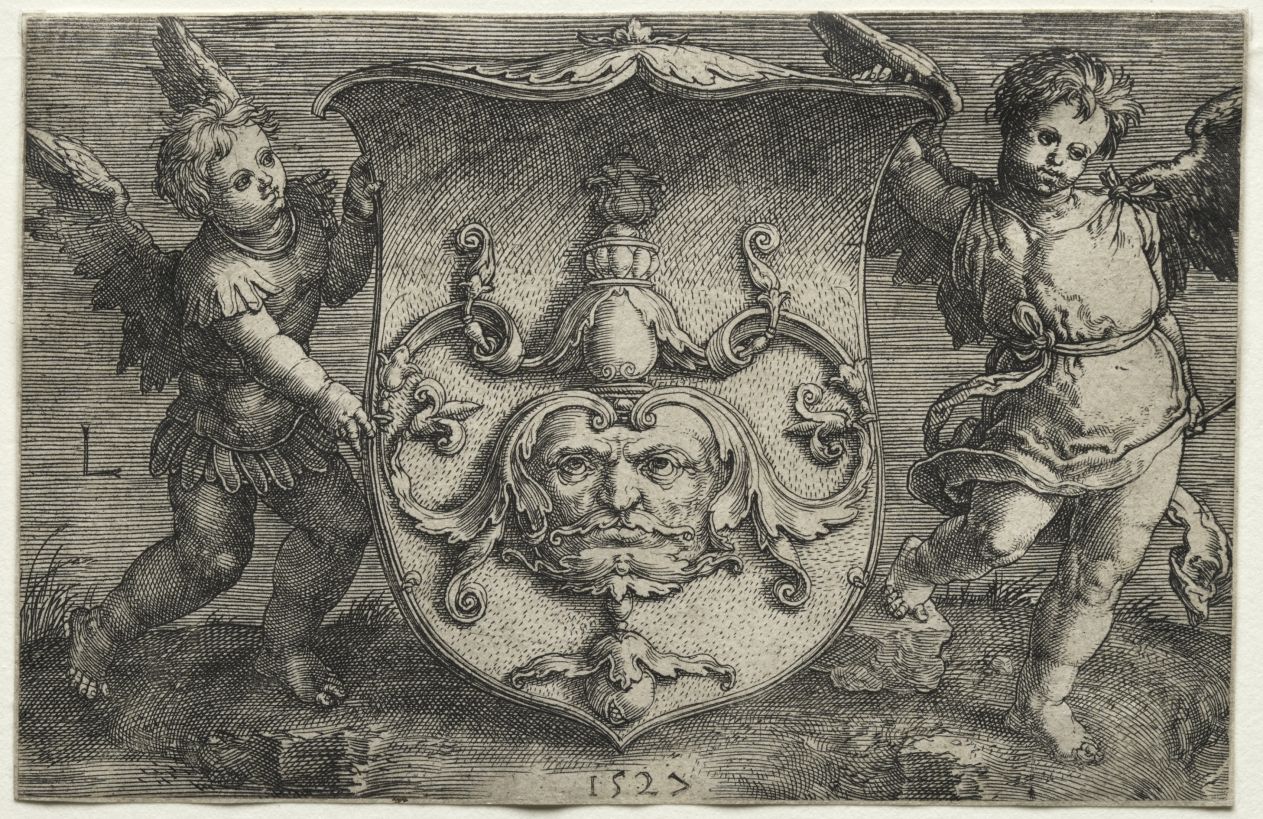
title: A Shield Bearing a Mask Supported by Two Genii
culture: Netherlands, 16th century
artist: Lucas van Leyden (Netherlandish, 1494–about 1533)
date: 1527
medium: engraving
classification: Print